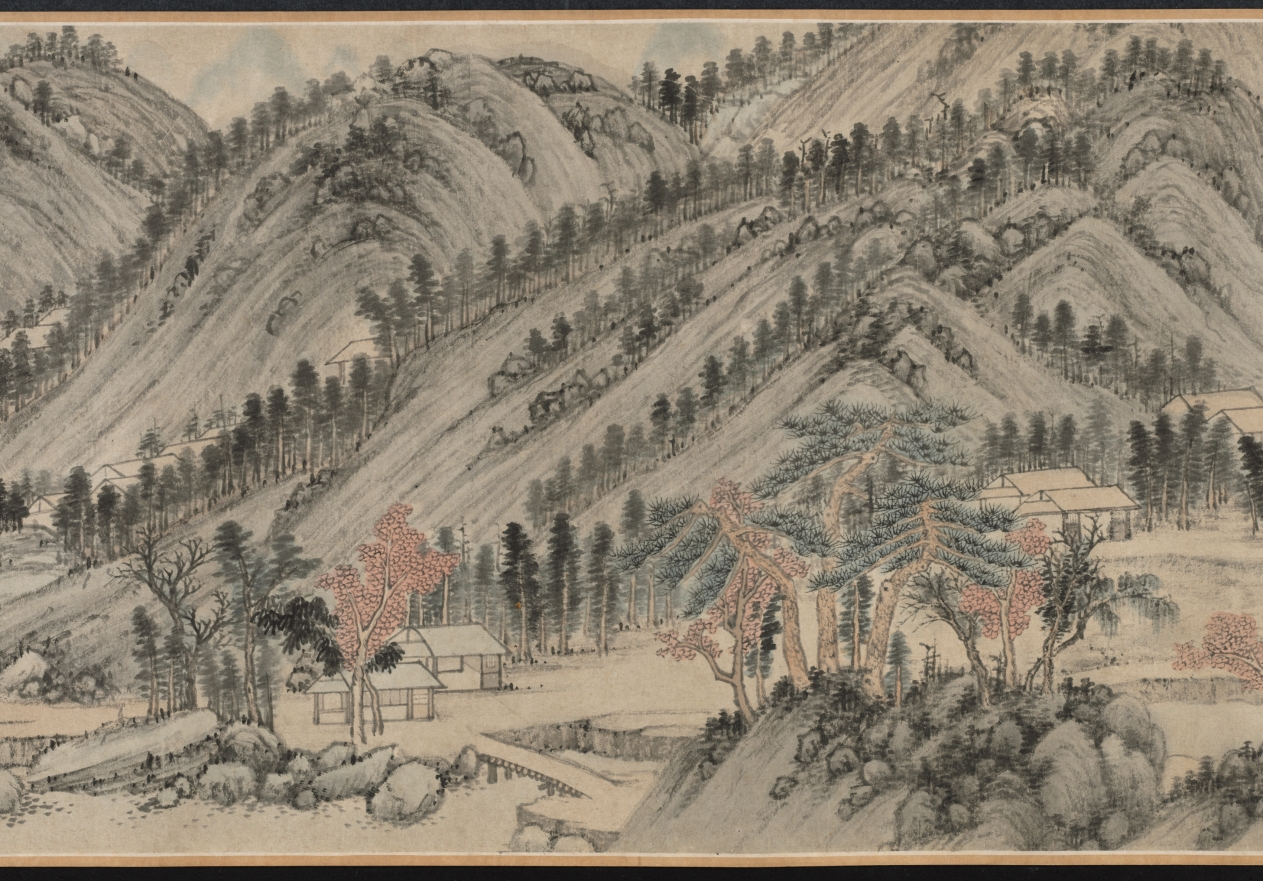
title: Mt. Taibo in the Style of Wang Meng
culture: China, Ming dynasty (1368–1644)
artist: Du Qiong (Chinese, 1396–1474)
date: 1442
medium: handscroll; ink and light color on paper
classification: Painting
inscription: Artist's inscription, signature, and 11 seals: [1 seal] Tung-yüan chai. Huang-ho-shan-ch'iao [Wang Meng] painted a painted called T'ai-po Mountain. Its brushwork is superior and admirable, which is very close to Yu-ch'en [Wang Wei, 699-759]. The cleverness of its composition, the maple groves and rustic temples, the inaccessible ravines and autumnal plateaus, the periolous peaks and strange rocks, etc., all seem to be so natural. The paper is only a little over eight feet, but the landscape has the range of a thousand miles. Once you open and note the contents, it is as if one were roaming among the mountain peaks enveloped in mist and clouds, and forgot the dusty world. When I first saw this, I was so mixed with excitement and joy that I could not take my hands off the painting. So I put it on the table, and tried my best to imitate it, forgetting sleeping and eating for about three months before it was completed. Although I do not dare to tread in the footsteps of Huang-ho shan ch'iao, I took great pains to capture his spirit in composition and colors. I do not know whether it would pass the judgment of the experts. On the fifteenth day of the fifth month, the seventh year of the Cheng-t'ung year [1442], inscribed by Tung-yüan, Tu Chiung. [2 seals] Yung-chia; Ching-chieh ming-men. [8 seals on painting] Tung-yüan chai; Ching-chieh ming-men; Yung-chia; Tu Ch'iung yin; Tung-yüan (repeated 5 times). trans. WKH/LYSL 3 colophons and 7 additional seals: 1 colophon and 2 seals of Chou Ting (1401-1487); 1 colophon and 2 seals of Wu K'uan (1435-1504); 1 colophon, dated 1655, and 2 seals of Lan Ying (1585-after 1664).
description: When a Chinese painter "imitated" a painting by a past master, the intention was never to produce an exact copy. Du Qiong, the Ming painter from Suzhou, is a case in point. The painting style of this handscroll is actually closer to that of Huang Gongwang (1269–1354) than to the style of Wang Meng (about 1301–1385). Both masters were active during the previous dynasty and are among the so-called Four Great Masters of the Yuan dynasty (1279–1368). In this painting, the interplay of styles, including Du Qiong's own, contribute to an inner dimension that is more than visual. Mt. Taibo is located in the province of Zhejiang and is known for its scenic beauty. In this scroll, however, it is not depicted literally. The image is an ideal representation of mountains in southeastern China.